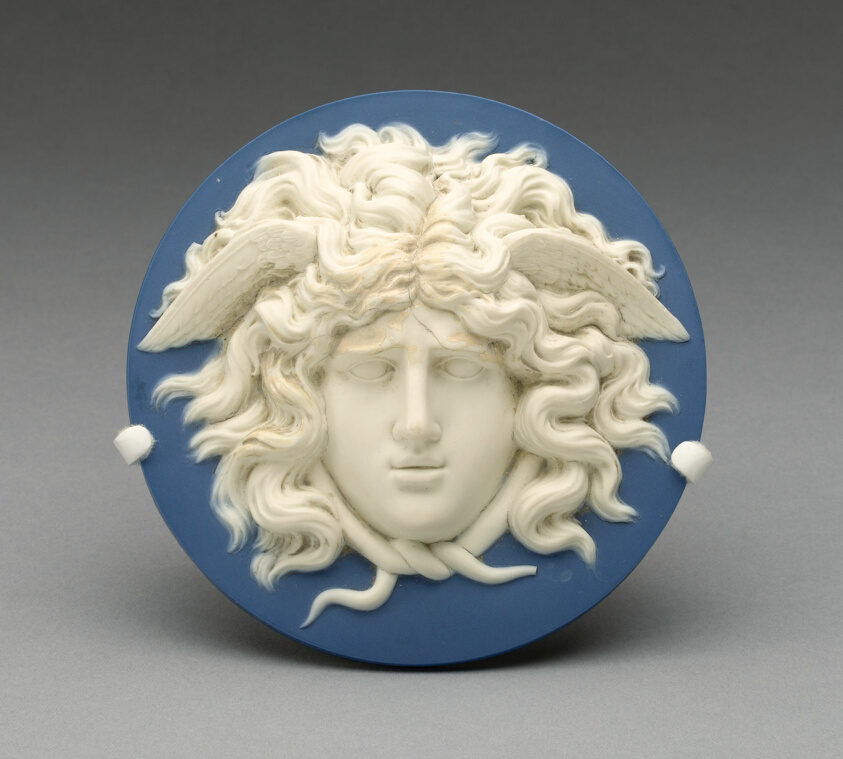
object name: Ceramics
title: Medallion with Head of Medusa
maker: Wedgwood Manufactory (England, founded 1759)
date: 1774/80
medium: Stoneware (jasperware)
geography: Burslem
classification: sculpture; ceramics; stoneware; european decorative arts